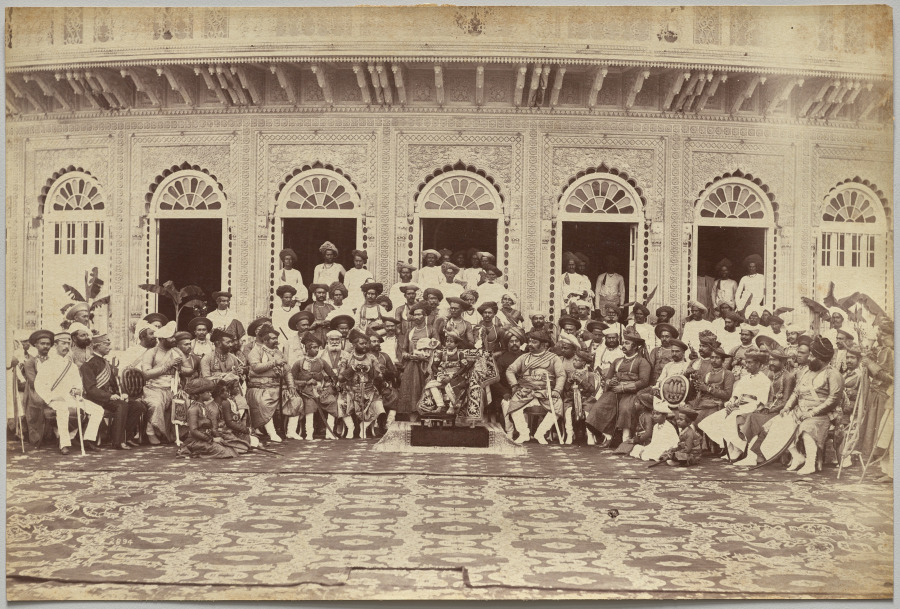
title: Maharaja of Scindia, nobles, and high officials, Gwalior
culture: India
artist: Raja Deen Dayal (Indian, 1844–1905)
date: c. 1882–87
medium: albumen print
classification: Photograph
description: These photographs are part of an album, now disassembled, of around 105 photographs taken in India between 1885 and summer 1887 that provide glimpses into the lives of the British colonial elite and royal and upper-class Indians. The museum holds another group of 37 pictures from this album (2016.266), which was probably commissioned by a British civil servant visiting or working in India around 1888 as a personal souvenir of his experiences there.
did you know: Raja Deen Dayal is regarded now, and was considered during his lifetime, to be India’s most important 19th-century photographer.